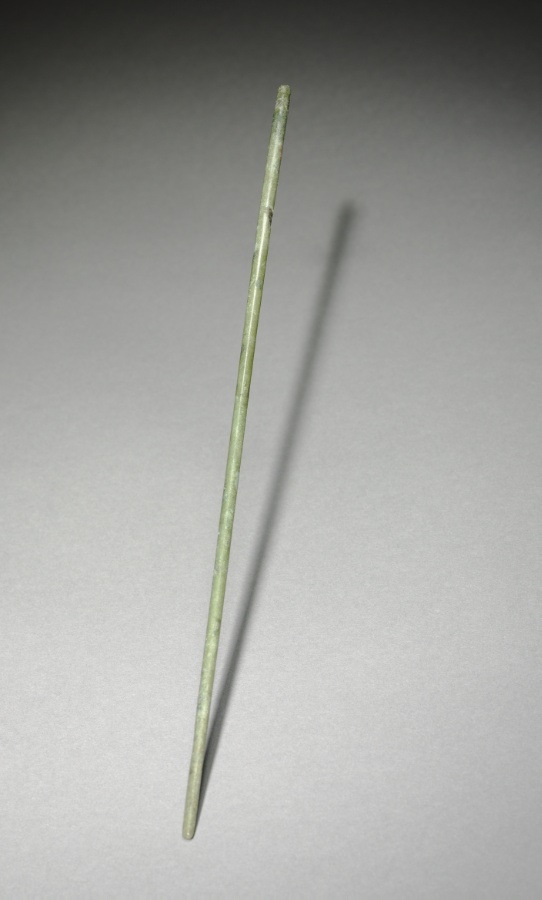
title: Chopstick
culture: Korea, Goryeo dynasty (918–1392)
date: 918–1392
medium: bronze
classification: Metalwork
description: In Korea, chopsticks made of metal such as brass, silver, and gold were excavated from ancient tombs and ruins dated to the 6th century at the earliest. Burial goods often include utilitarian objects such as table wares and utensils because the dead were believed to need them in the afterlife.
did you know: In contrast to the Chinese and Japanese, Koreans still prefer metal chopsticks (stainless steel and brass) to wooden ones.